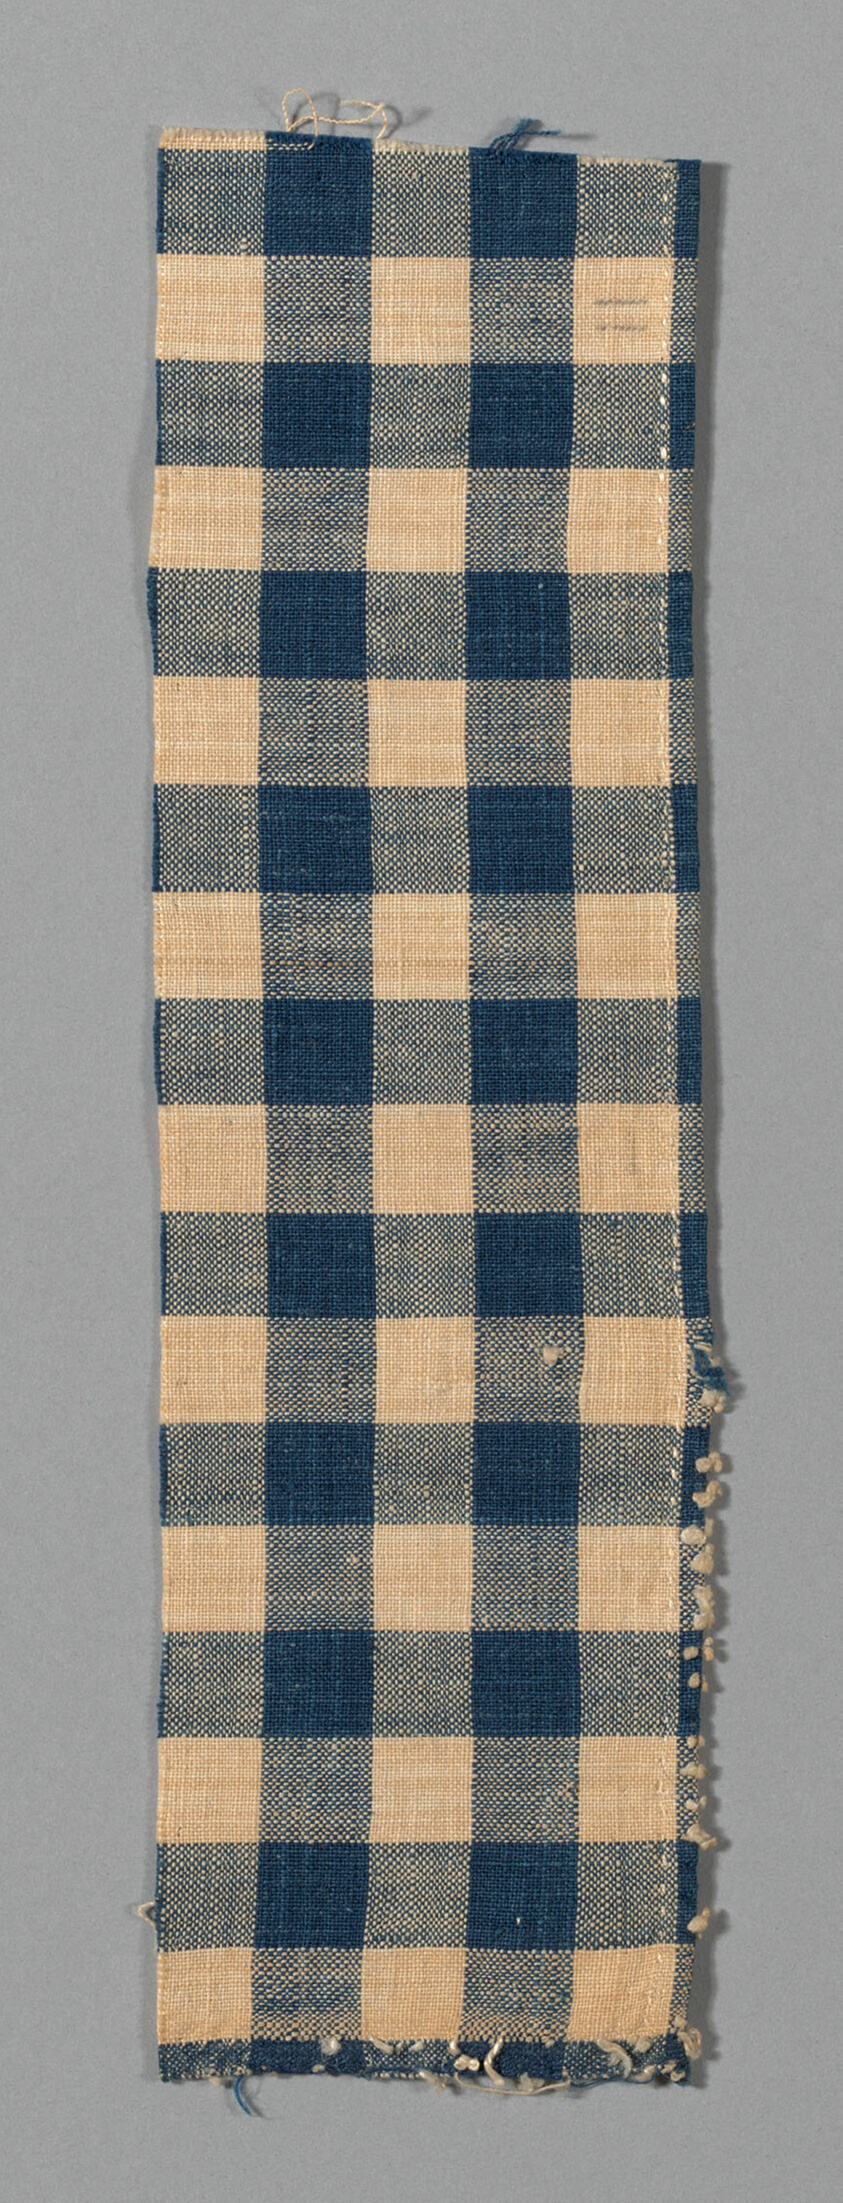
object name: Textile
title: Fragment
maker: United States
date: early 19th century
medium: Sample of stripe and check patterns of blue, white and tan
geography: United States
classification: textile; weaving